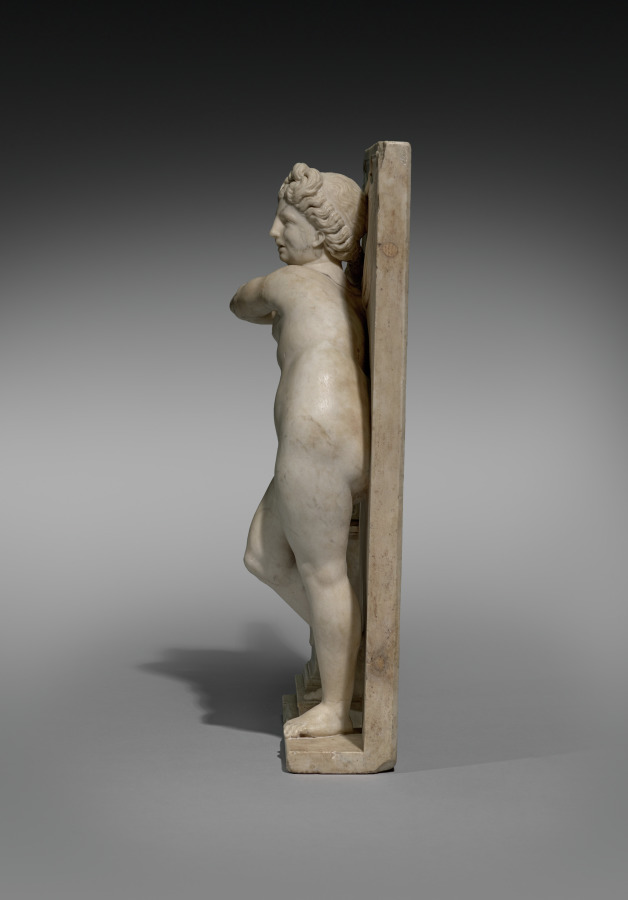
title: Dido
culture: Italy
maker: Aurelio Lombardo (Italian, 1501–1563)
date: c. 1525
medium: marble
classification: Sculpture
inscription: PVNICA SVM [DIDO ERE]XI QVAE MOENIA BYRSA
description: Artists customarily portrayed Dido as a forlorn lover abandoned by the Trojan hero, Aeneas, but here she is a conquering queen. Dido draws aside an oxhide curtain, a reference to the mythical founding of Carthage (in modern-day Tunisia, North Africa), when she was given an oxhide to demarcate granted land. By cutting it into thin strips she was able to encircle the future city. Dido was likely created for display in a studiolo, a place of study featuring refined works of art appreciated by humanist scholars and aficionados during the Renaissance.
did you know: Dido’s nudity and hairstyle are allusions to ancient Greek images of Aphrodite.